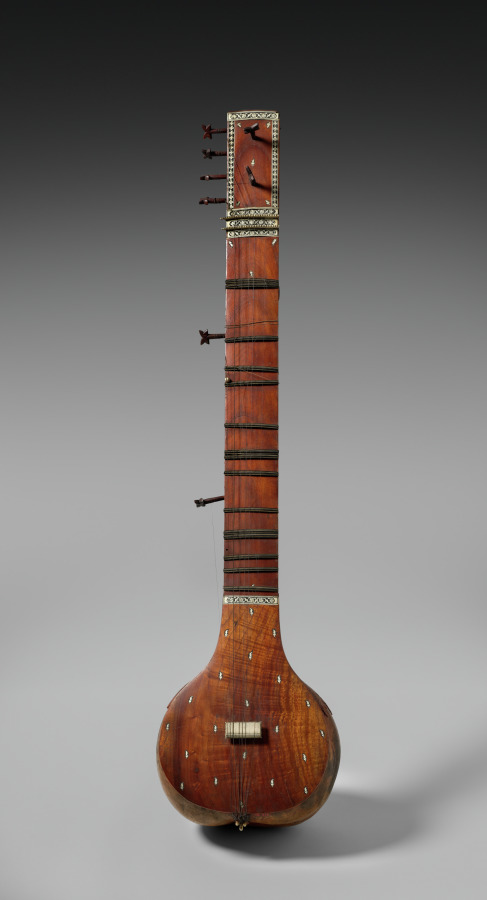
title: Sitar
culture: East India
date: 1800s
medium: Gourd, wood, ivory inlay, ebony? inlay, gut, and metal strings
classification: Musical Instrument